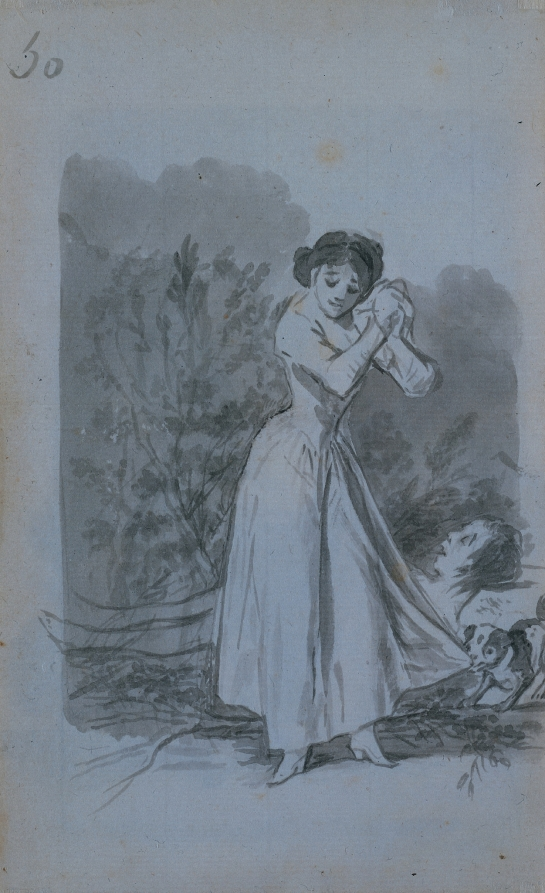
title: Young Woman Wringing Her Hands over a Man's Naked Body, Folio 50 (verso)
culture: Spain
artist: Francisco de Goya (Spanish, 1746–1828)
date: 1796–97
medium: brush and gray and black washes on laid paper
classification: Drawing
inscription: by artist, upper left, in gray wash: 50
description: Among the great figures of the pictorial arts in the West, Francisco de Goya is one of the very few whose work as a graphic artist is arguably even more important than his paintings. Alongside a prodigious output of prints, he created eight sketchbooks of drawings over the course of 30 years. This double-sided sheet comes from the so-called Album B, or Madrid Album, which, like all of them, was scattered throughout the world in public and private collections after his death. The drawings reveal Goya’s powers of invention and observation, and his biting satire. On the recto side of the sheet, a vulgar encounter between a prostitute and a pot-bellied lecher reveals the bluntness of the Goya’s social criticism. The verso drawing is less easily pinned down, though it follows traditional iconography for representations of Saint Margaret of Cortona, a nobleman’s mistress who repented and entered a convent after her lover’s dog led her to his murdered corpse.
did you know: Much of Francisco de Goya's graphic output of drawings and prints was not made public until well after his death.